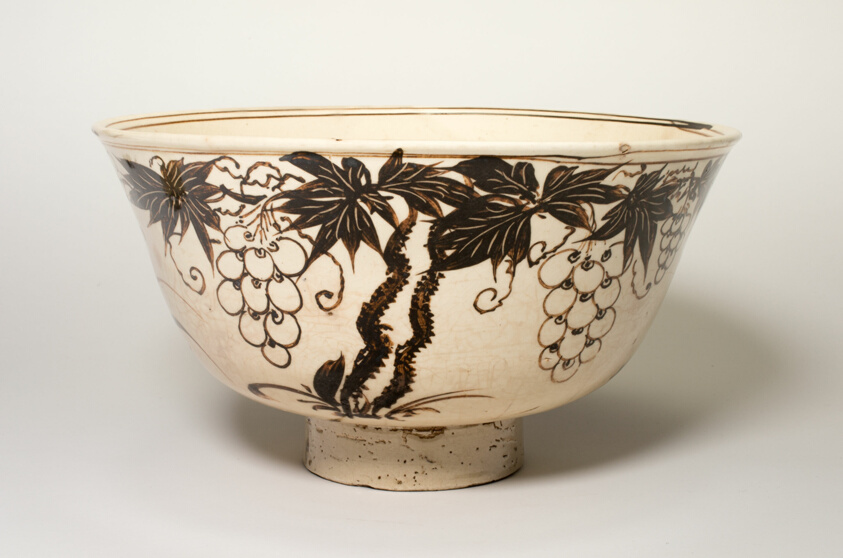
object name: Vessel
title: Bowl with Grapes, Willow Tree, and Bird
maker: China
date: Yuan or Ming dynasty, 14th century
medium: Cizhou ware; stoneware with white slip and iron-brown glazes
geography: China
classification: stoneware; asian art; ceramics